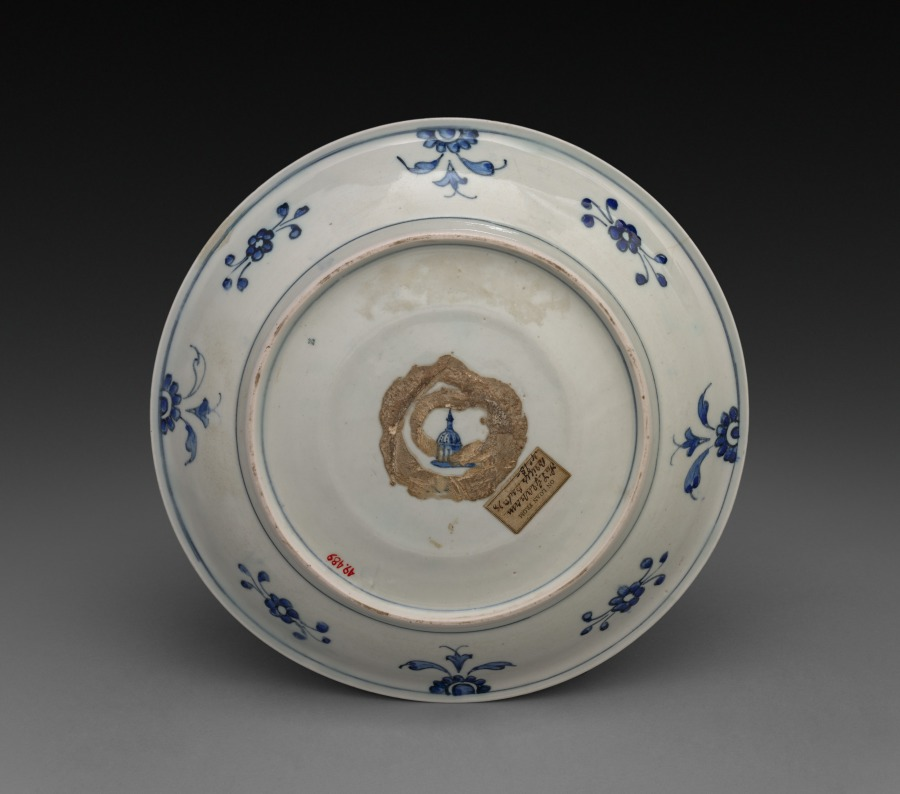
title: Plate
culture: Italy, 16th century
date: 1575–87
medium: soft-paste porcelain (called Medici porcelain)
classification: Ceramic